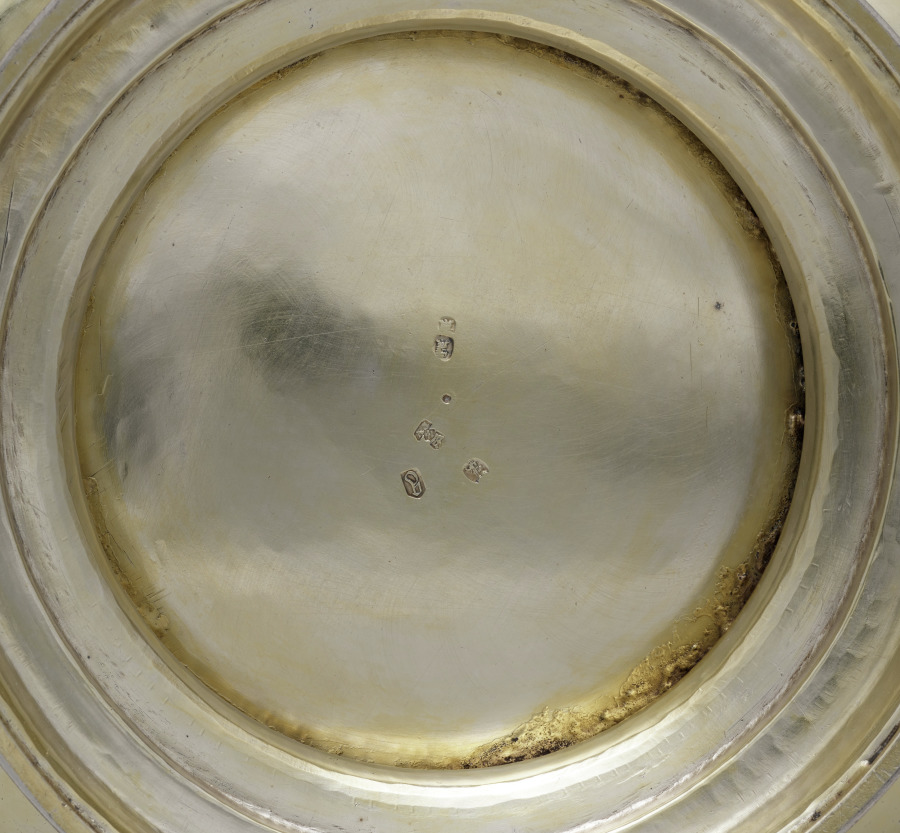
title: Bowl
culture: England, London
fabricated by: Benjamin Pyne (English, active 1693–1727)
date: 1715–16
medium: silver gilt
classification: Silver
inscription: engraved, center of bowl: arms, crest of Byam family (mantling and helmet were probably engraved at time bowl was made, crest and arms were altered to those of Byam at later date). Rim engraved with Byam Crest (also presumably not original).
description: This bowl’s notched rim allows for glasses to be suspended in water for cooling and cleansing between courses during a long dinner. The rim can be removed and the bowl used for punch as well. A year before Benjamin Pyne began this bowl, he was appointed Subordinate Goldsmith to the King in preparation for George I’s coronation (r. 1714–1727). Like much of his work, this Monteith bowl is characterized by its scale and simplicity.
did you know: The name Monteith is said to come from a mythical Scotsman named Monteigh, who wore cloaks with a similar notched pattern.